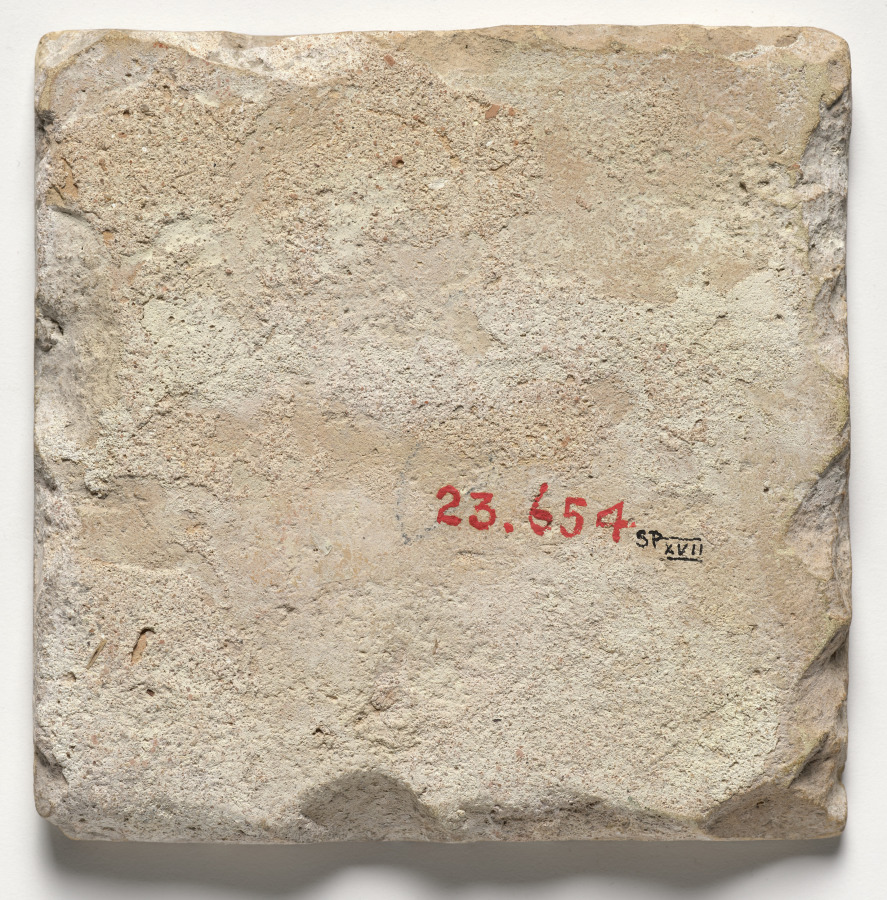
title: Wall Tile–Rampant Lion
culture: Spain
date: c. 1600s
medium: glazed ceramic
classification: Ceramic